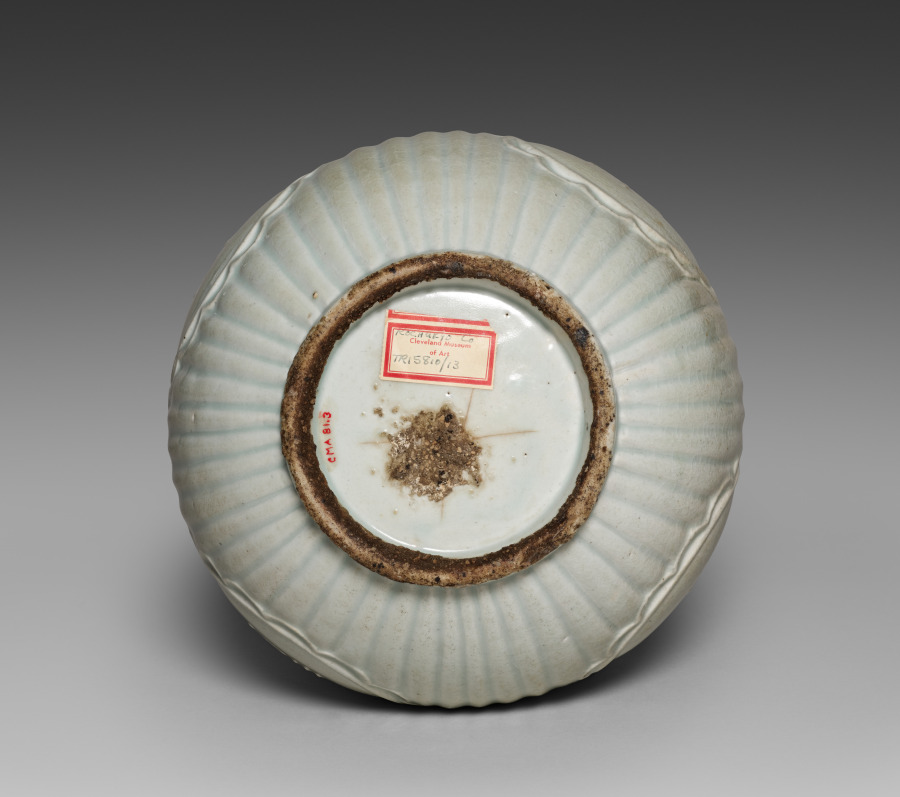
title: Jar with Four Auspicious Characters in Relief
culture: Korea, Joseon dynasty (1392–1910)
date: 1800s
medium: glazed porcelain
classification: Ceramic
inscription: longevity 壽, happiness 福, health 康, and peace 寧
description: This white porcelain vase is decorated with four Chinese characters symbolizing auspicious (hopeful) wishes—longevity, good fortune, health, and peace—each within a floral medallion. Such jars were often presented as birthday or wedding gifts, conveying the giver’s blessings for a long and harmonious life. This object was purchased in 1981 from Kochukyo (壺中居), an antique gallery founded in 1924 in Tokyo, Japan. Many important Korean works remain in Japanese private collections, after being taken there during the Japanese colonial period (1910–45). Consequently, Japanese antique galleries continue to handle Korean antiquities, serving as significant channels for their circulation today.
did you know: This type of jar with auspicious characters was often used as a birthday or wedding gift.